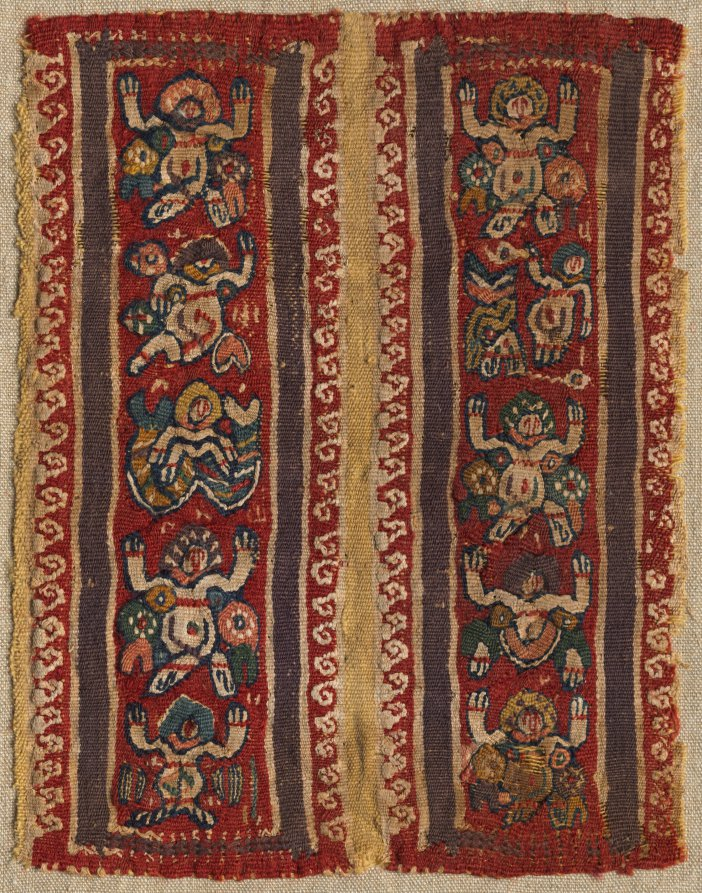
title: Fragment, Sleeve Ornament of a Tunic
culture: Egypt, Byzantine period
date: 400s - 600s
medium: tabby weave with inwoven tapestry ornament, linen and wool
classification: Textile